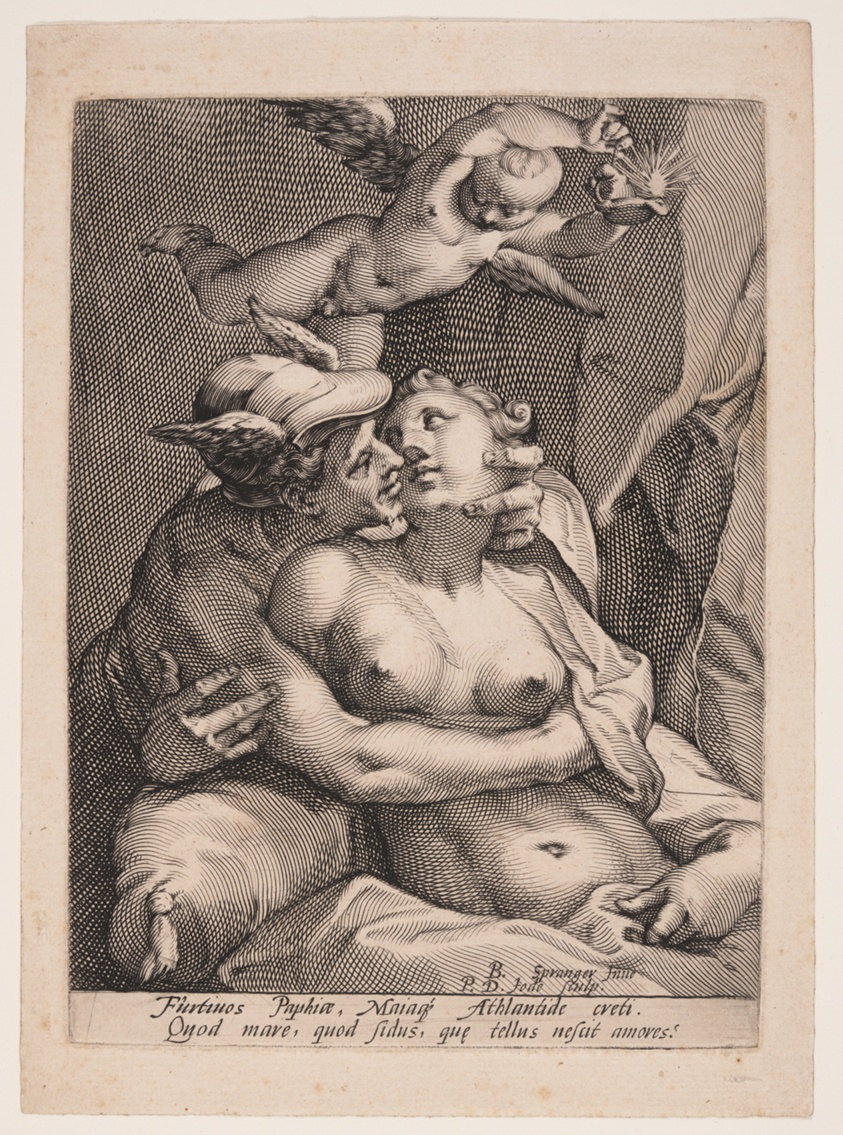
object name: Print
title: Mercury, Venus, and Cupid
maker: Pieter de Jode I (Flemish, 1570–1634); after Bartholomeus Spranger (Flemish, 1546–1611)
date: c. 1585-1600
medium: Engraving on laid paper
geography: Flanders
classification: engraving; paper; print; prints and drawing